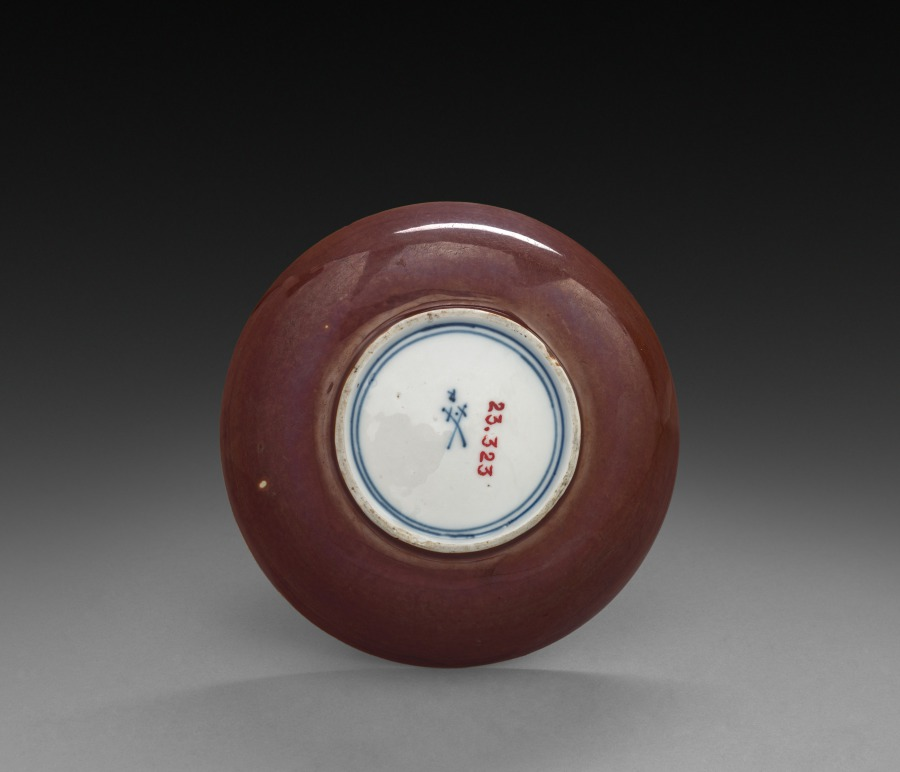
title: Saucer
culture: Germany, Meissen, 18th century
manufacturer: Meissen Porcelain Factory (German, est. c. 1710)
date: 1756–80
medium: porcelain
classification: Ceramic